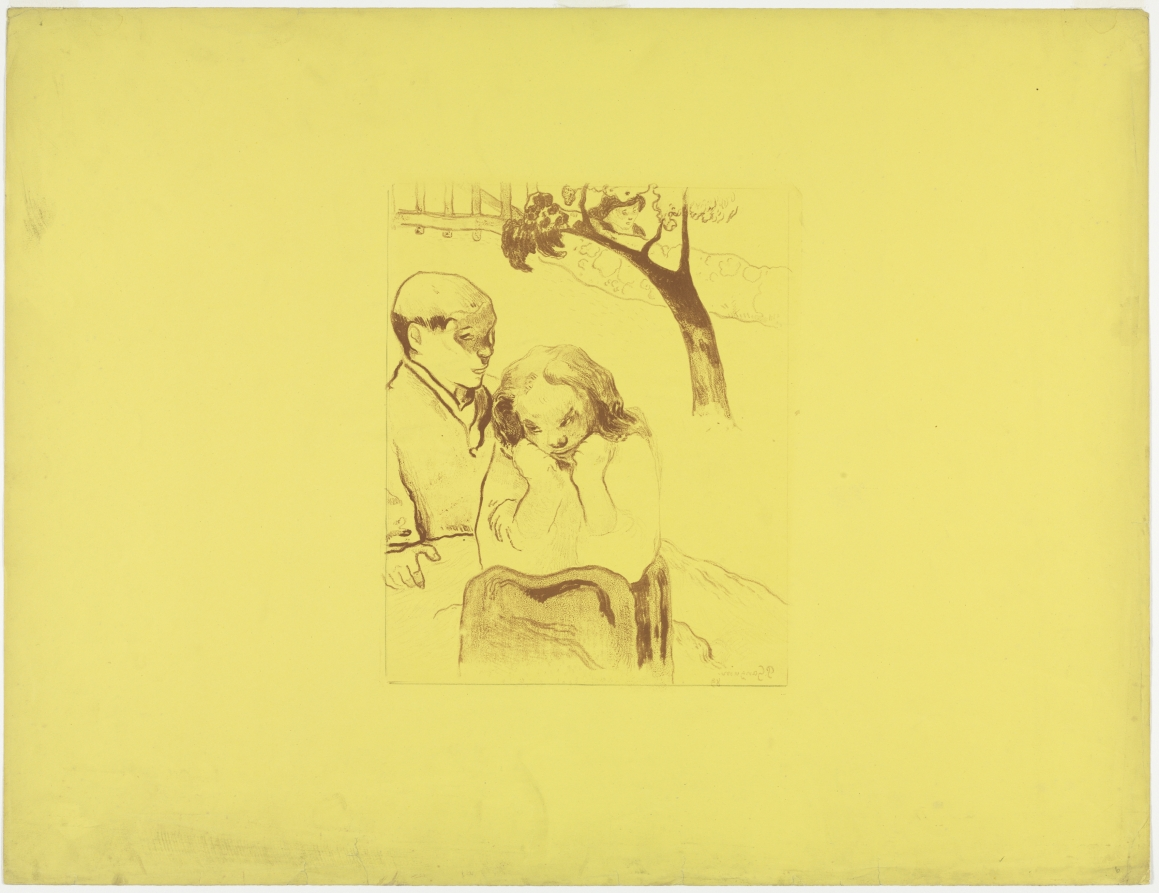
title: Volpini Suite: Human Misery (Misères Humaines)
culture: France, 19th century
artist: Paul Gauguin (French, 1848–1903)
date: 1889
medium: zincograph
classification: Print